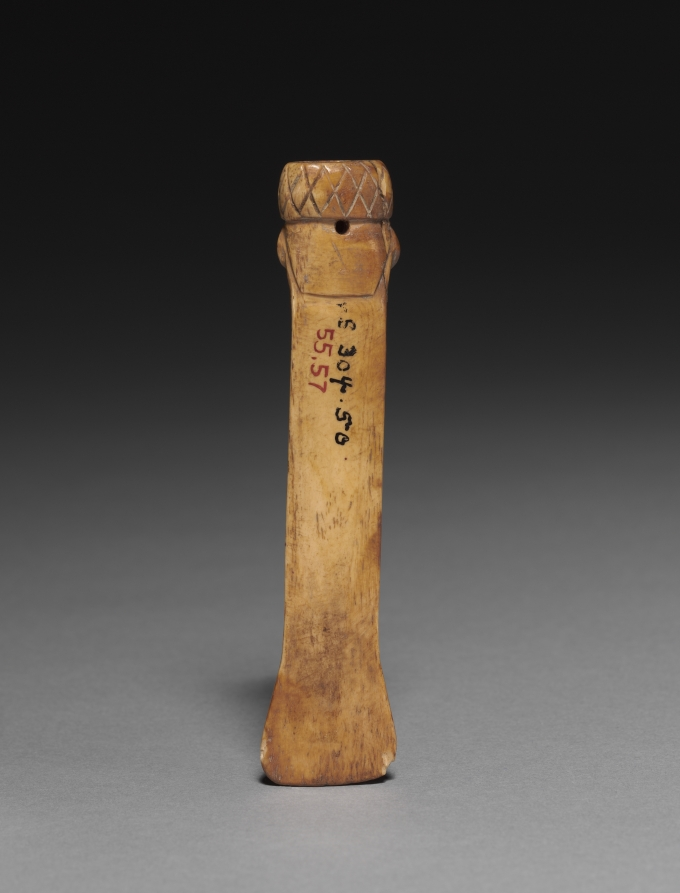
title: Spatula with Carved Head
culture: Peru, Wari style (500-900)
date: 500–900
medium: bone with shell inlay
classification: Jewelry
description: Peruvian Indians today regard coca leaf as a sacred substance that creates communion with supernatural forces. The leaves are chewed with powdered lime that in antiquity was stored in containers and scooped with spatulas like those seen here. Aside from its ritual meaning, coca has practical benefits: it is vitamin-rich; like coffee, it induces clear-headedness; and it increases stamina. The lizard spatula is Nasca in style; the other is Wari.